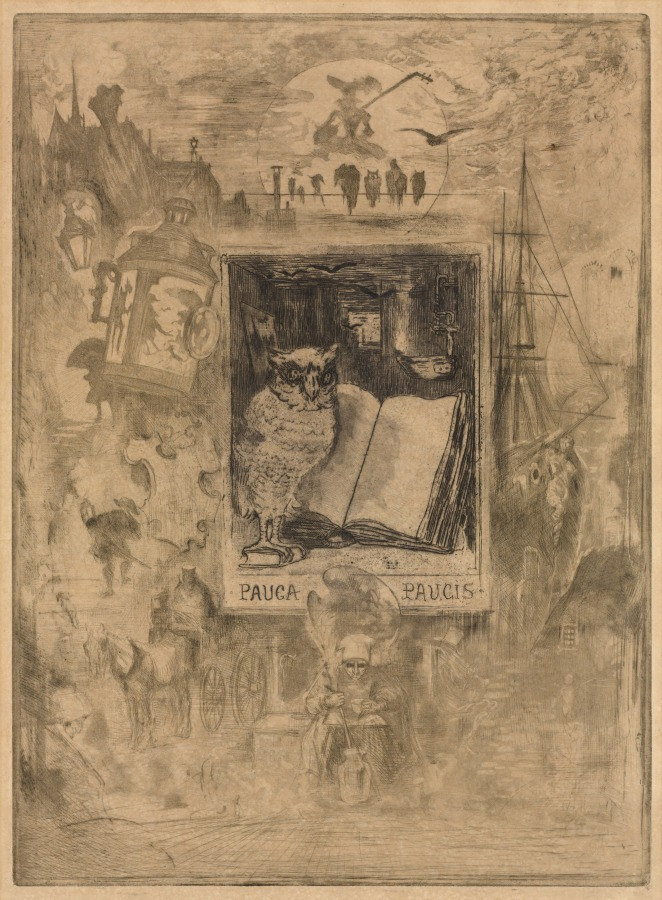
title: The Owl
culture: France, 19th century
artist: Félix Hilaire Buhot (French, 1847–1898)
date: 1883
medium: etching, drypoint, aquatint and roulette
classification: Print